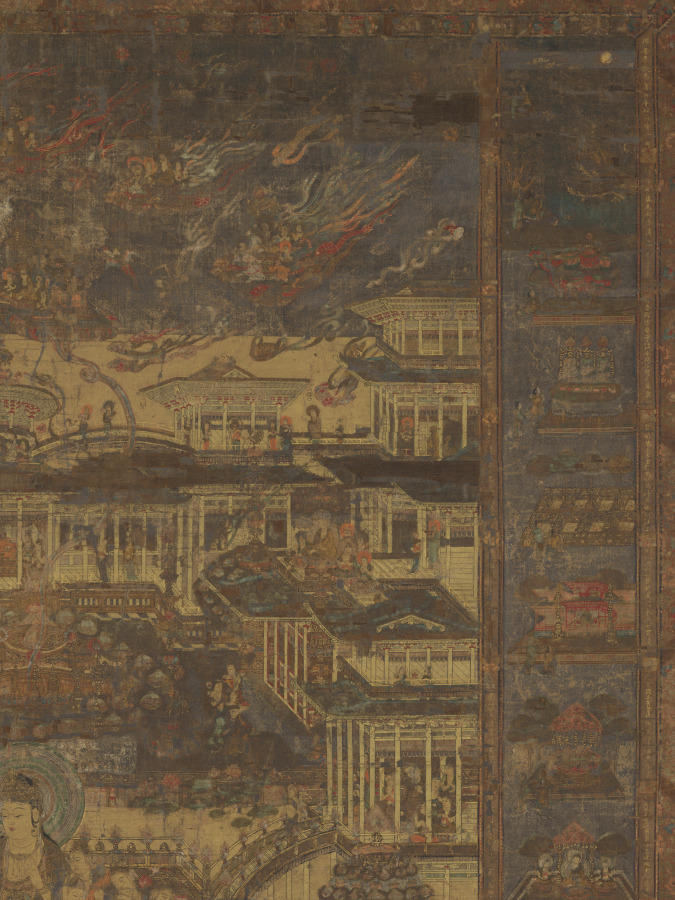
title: Taima Mandala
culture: Japan, Kamakura period (1185–1333)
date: early 1300s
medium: hanging scroll; ink, color, and gold on silk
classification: Painting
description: This painting is a copy after an 8th-century woven mandala belonging to the temple Taimadera. The composition is based on a sacred text that describes the Buddha Shakyamuni’s explanation of Amida’s Pure Land to Queen Vaidehi, as well as his instructions to her on visual meditation upon the Pure Land. The Pure Land appears at the center of the painting. To the left is the story of Queen Vaidehi’s encounter with Shakyamuni, and to the right are the scenes she is given to visualize. The bottom illustrates the nine levels of birth that can be attained in the Pure Land.